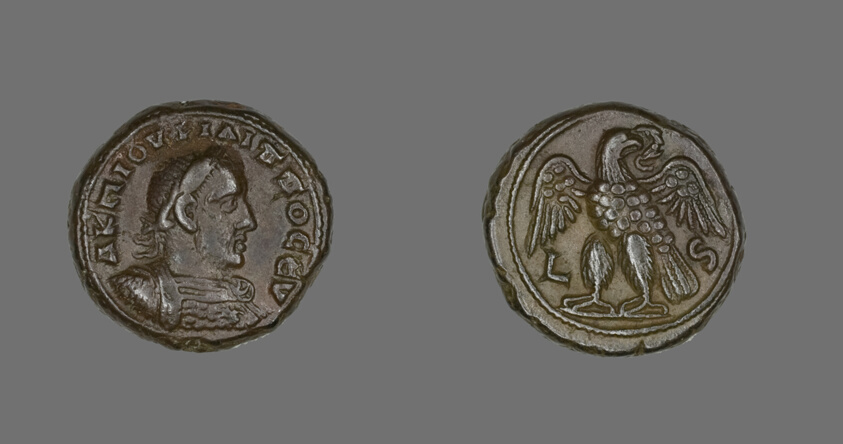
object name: Coin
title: Coin Portraying Emperor Philip I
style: roman (ancient, style or period), ancient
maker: Roman, minted in Alexandria, Egypt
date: 244-249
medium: Billon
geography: Roman Empire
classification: coin; ancient art